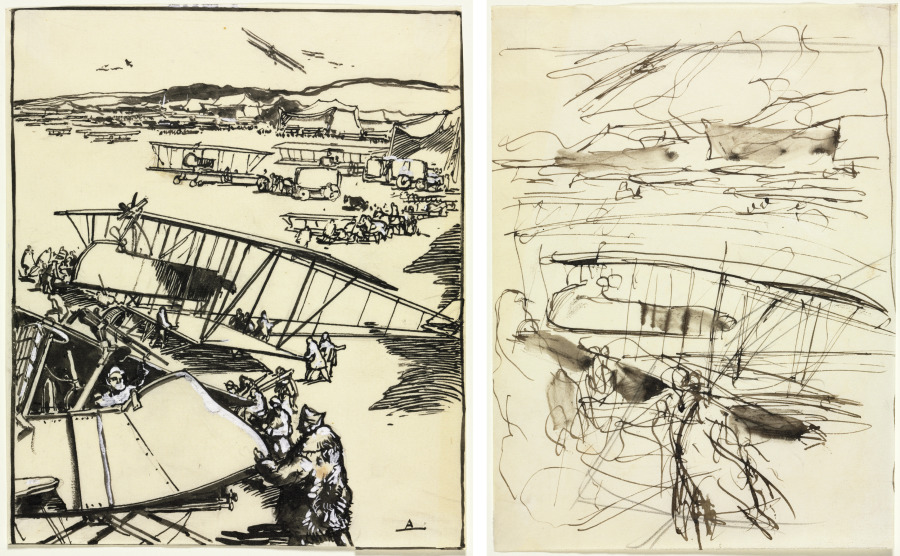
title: Avions reposant sur le terrain (recto and verso)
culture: France, 20th century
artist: Auguste Louis Lepère (French, 1849–1918)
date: 1914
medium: brush and brown ink and wash over pencil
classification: Drawing